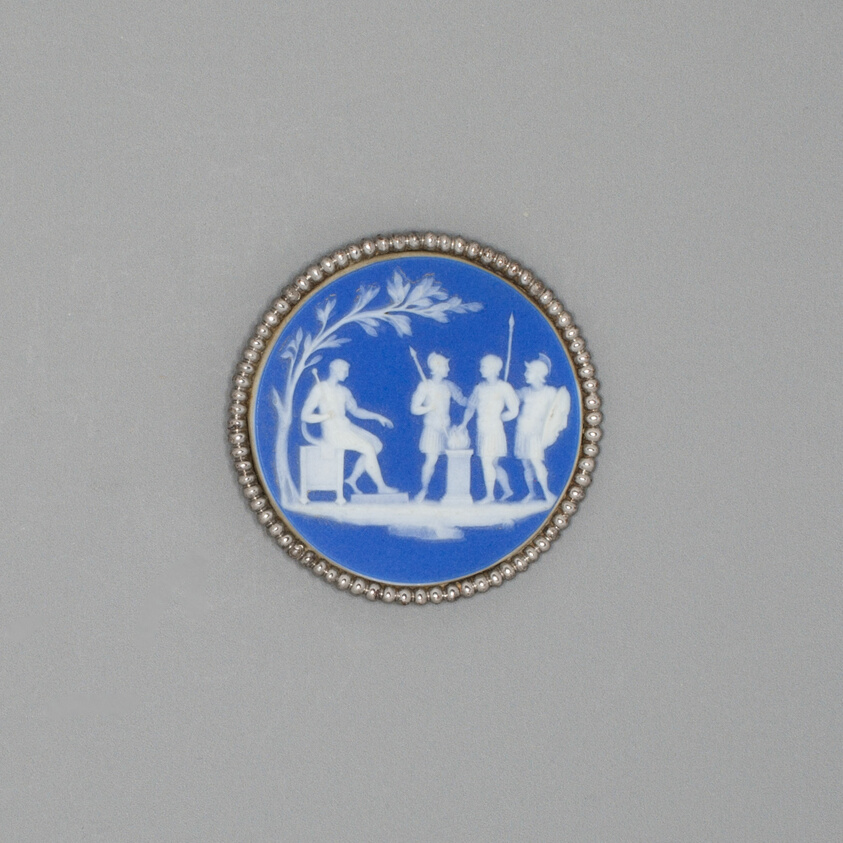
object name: Ceramics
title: Button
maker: Wedgwood Manufactory (England, founded 1759)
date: Late 18th century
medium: Stoneware (jasperware)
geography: Burslem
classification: accessories (object genre); stoneware; european decorative arts; ceramics